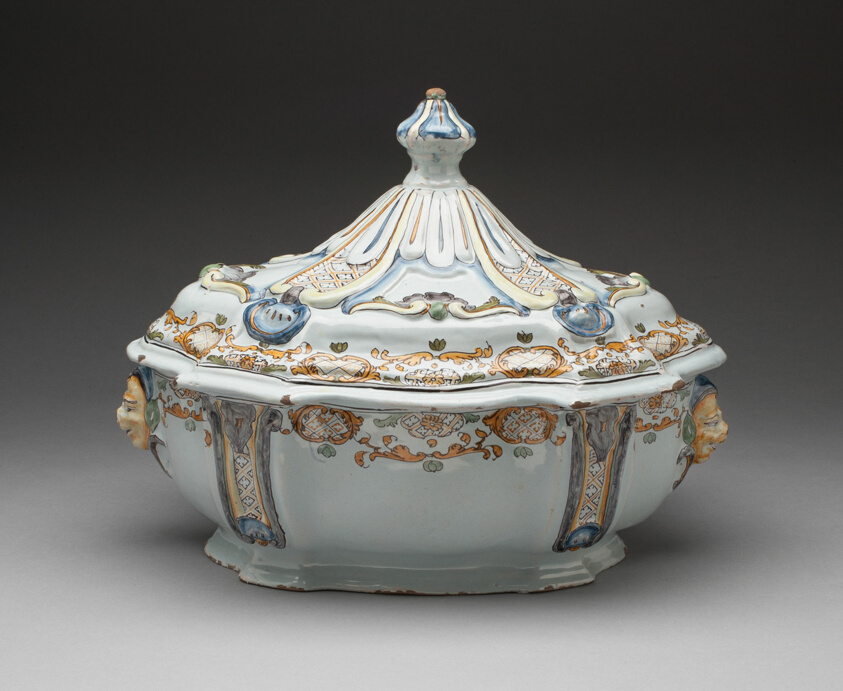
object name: Ceramics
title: Tureen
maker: France, Moustiers or Italy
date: 18th century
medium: Tin-glazed earthenware (faience)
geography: Moustiers-Sainte Marie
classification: ceramics; european decorative arts